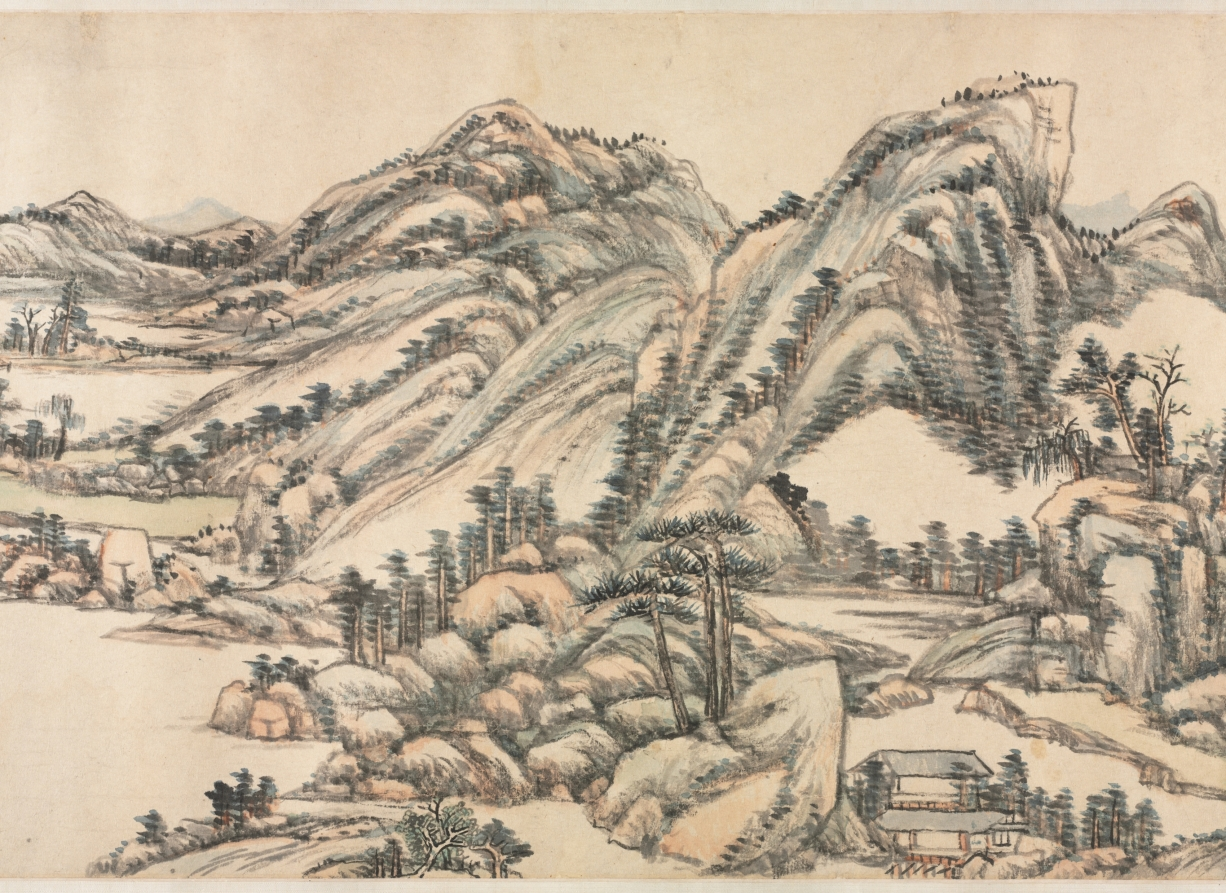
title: Green Peaks under Clear Sky: After Huang Gongwang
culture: China, Qing dynasty (1644-1911)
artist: Wang Yuanqi (Chinese, 1642–1715)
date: 1703–8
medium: handscroll; ink and light color on paper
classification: Painting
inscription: 晴巒霽翠：倣黃子久。麓臺。[印]石師道人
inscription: [印] 御書畫圖留與人看. 子久畫於宋諸大家荊、關、李、范、董、巨，無所不有。運筆不假修飾。皴法由淡入濃，化諸家之迹者也。澹明徐君偶見縮本，臨摹六幅。囑余參以富春大意，成一長卷。余夙夜在公，乘暇偶一點染。至戊子九秋告竣，閱四、五年矣。昔大癡為無用師作富春卷，七年而成，為千古鉅觀。今拙筆癡鈍。亦淹留至此。可為識者噴飯矣。王原祁題。[印]王原祁印; 麓臺 [印, 畫芯左下] 西廬後人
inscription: 3 additional colophons and 15 additional seals: 1 colophon and 9 seals of Yang Shicong 楊士驄 (b. 1870); 1 colophon of Wu Hufan 吳湖帆 (1894–1968); 1 colophon and 1 seal of Wu Mei (20th c.); 5 seals of Cheng Qi 程琦 (1911–1988).